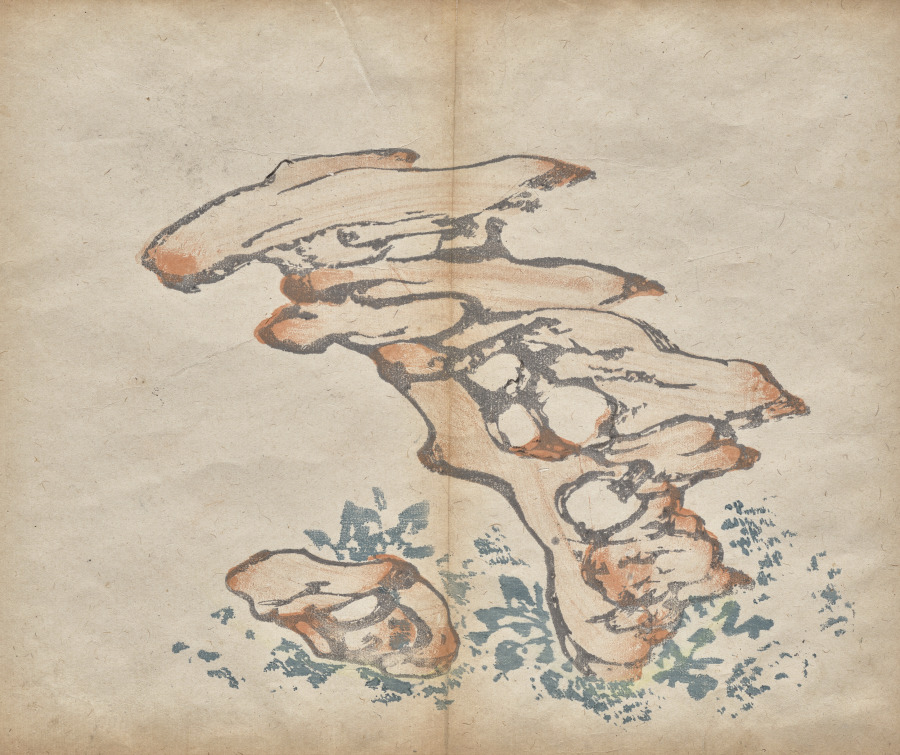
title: Untitled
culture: China, Ming dynasty (1368–1644)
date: 1625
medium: color woodblock print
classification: Print